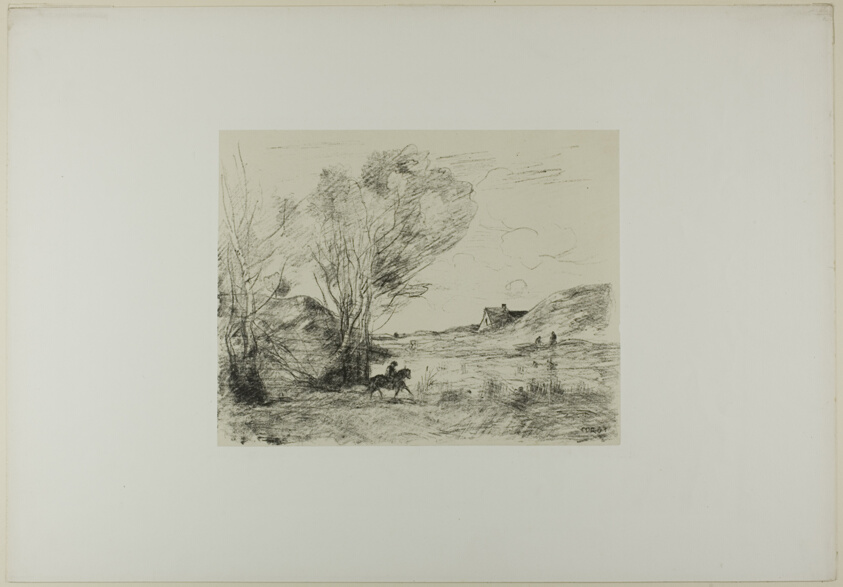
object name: Print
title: The Rider in the Reeds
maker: Jean-Baptiste-Camille Corot; French, 1796-1875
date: 1871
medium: Transfer lithograph in black on ivory China paper laid down on white wove paper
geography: France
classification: lithograph; print; prints and drawing